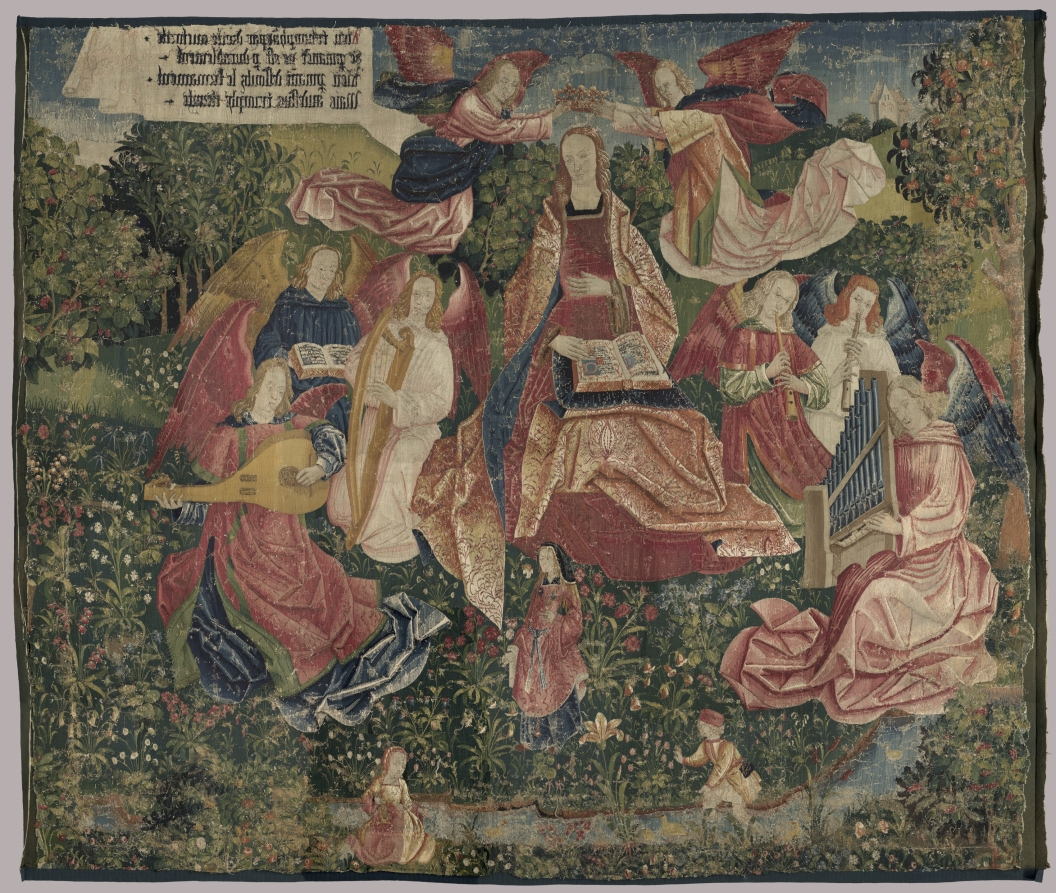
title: The Triumph of Eternity (from Chateau de Chaumont set)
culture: France, Lyon(?), early 16th century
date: 1512–15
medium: silk and wool; tapestry weave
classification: Tapestry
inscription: French verse in Gothic letters translates as follows: "Nothing triumphs by right authority, Unless it be conducted by Eternity. Nothing is permanent beneath the firmament, But above us triumphs Eternity."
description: The Triumph of Eternity is represented by the Coronation of the Virgin. Dressed in crimson velvet with an opulent brocaded velvet shawl, the Virgin is seated in the center as two angels hold a crown over her head. Five musical angels surround her playing an organ, recorder, straight cornetto, harp, and lute, while another sings from an open music book. The scenes in the set display a conservative style in which the figures are placed in shallow landscapes, thereby ignoring pictorial innovations for depicting space and mass. The verse in Old French at the top states: Nothing triumphing by due authority Remains permanent and durable. Nothing is permanent under the heavens, But above, eternity triumphs.